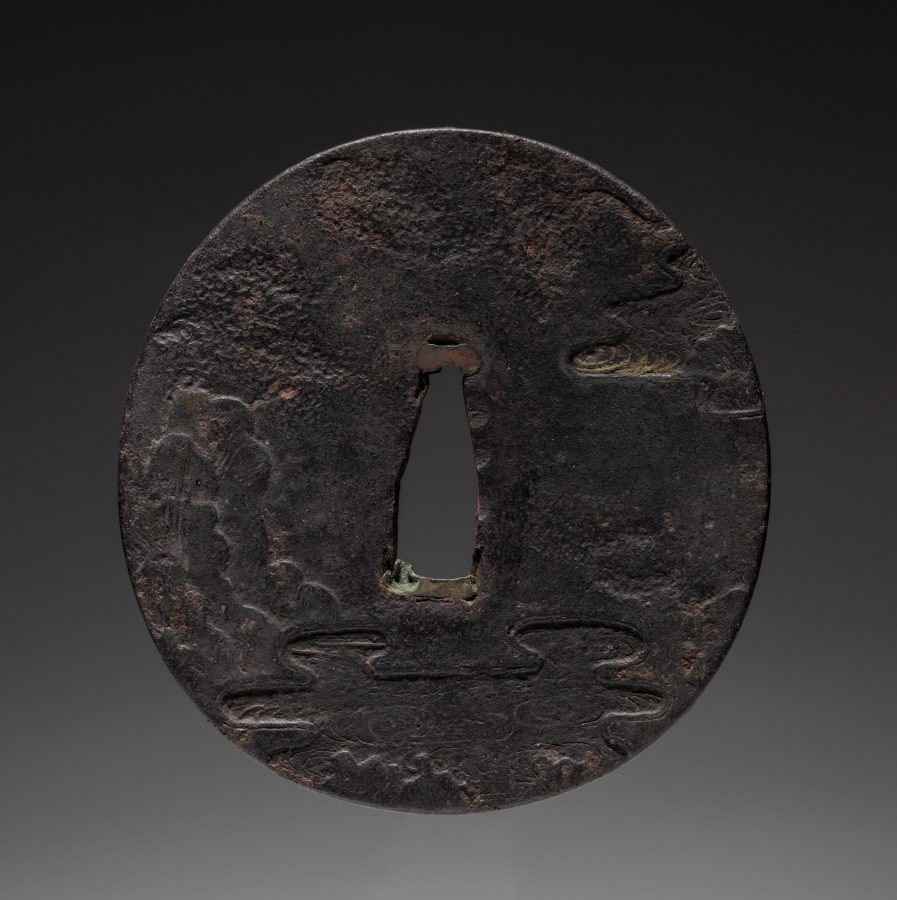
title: Sword Guard (Tsuba) with Landscape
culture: Japan, possibly Edo period (1615-1868)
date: c. 1615–1868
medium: iron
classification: Arms and Armor